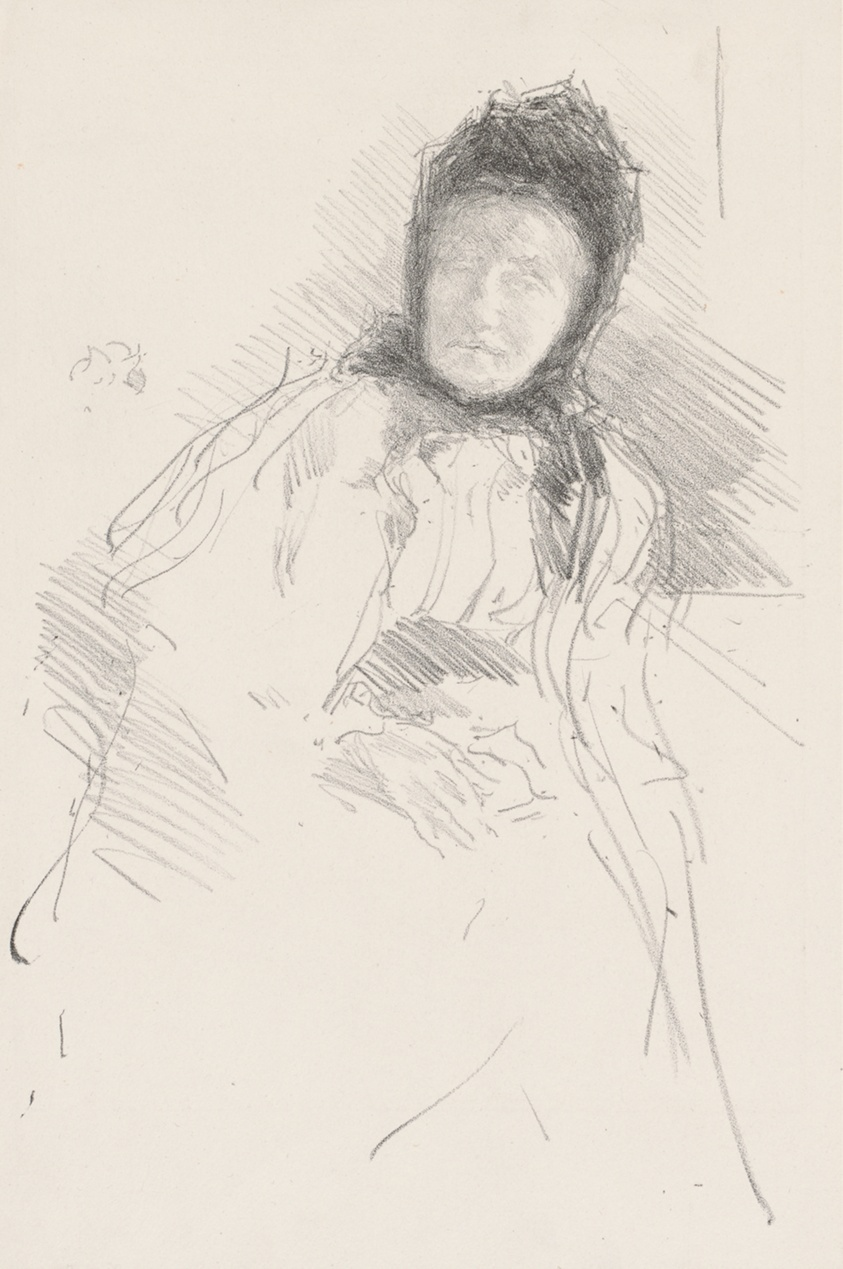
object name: Print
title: Unfinished Sketch of Lady Haden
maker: James McNeill Whistler (American, 1834-1903)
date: 1895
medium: Lithograph, in black ink, with scraping, on grayish white chine, laid down on ivory plate paper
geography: United States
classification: lithograph; print; prints and drawing; paper